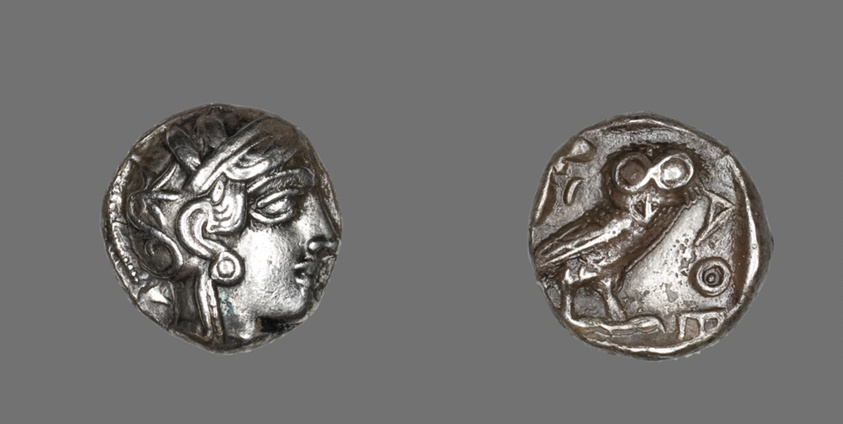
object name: Coin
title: Tetradrachm (Coin) Depicting the Goddess Athena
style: Classical, ancient, greek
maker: Greek, minted in Athens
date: 490-322 BCE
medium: Silver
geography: Ancient Greece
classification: coin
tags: goddesses, gods (deities)